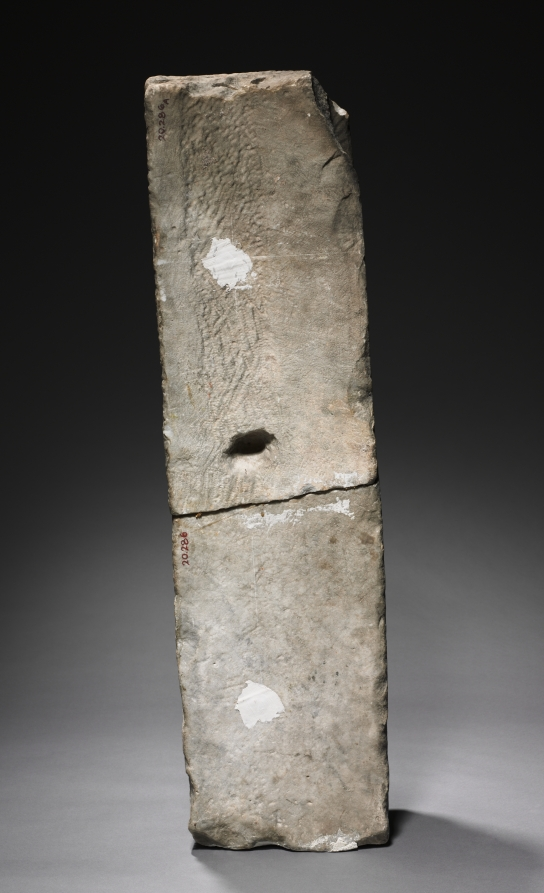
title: Transenna Post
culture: Lombardic, Italy, Rome, Migration period, 8th-9th Centuries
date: 700s-800s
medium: marble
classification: Sculpture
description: In Christian architecture a transenna is an openwork screen of stone or metal enclosing a shrine. These transenna elements were found in Rome; the posts were said to have been excavated on the Coelian Hill and may have originally formed part of the transenna of the Church of San Saba. The Lombards were an ancient Germanic-speaking tribe that settled in Italy after 568. Their artistic tradition was originally centered on small objects of personal adornment like buckles and brooches. After occupying Italy, the Lombards found themselves in contact with large-scale sculpture of classical and early Christian origin that, by the end of the 700s, they had learned to adopt and imitate, as seen here.